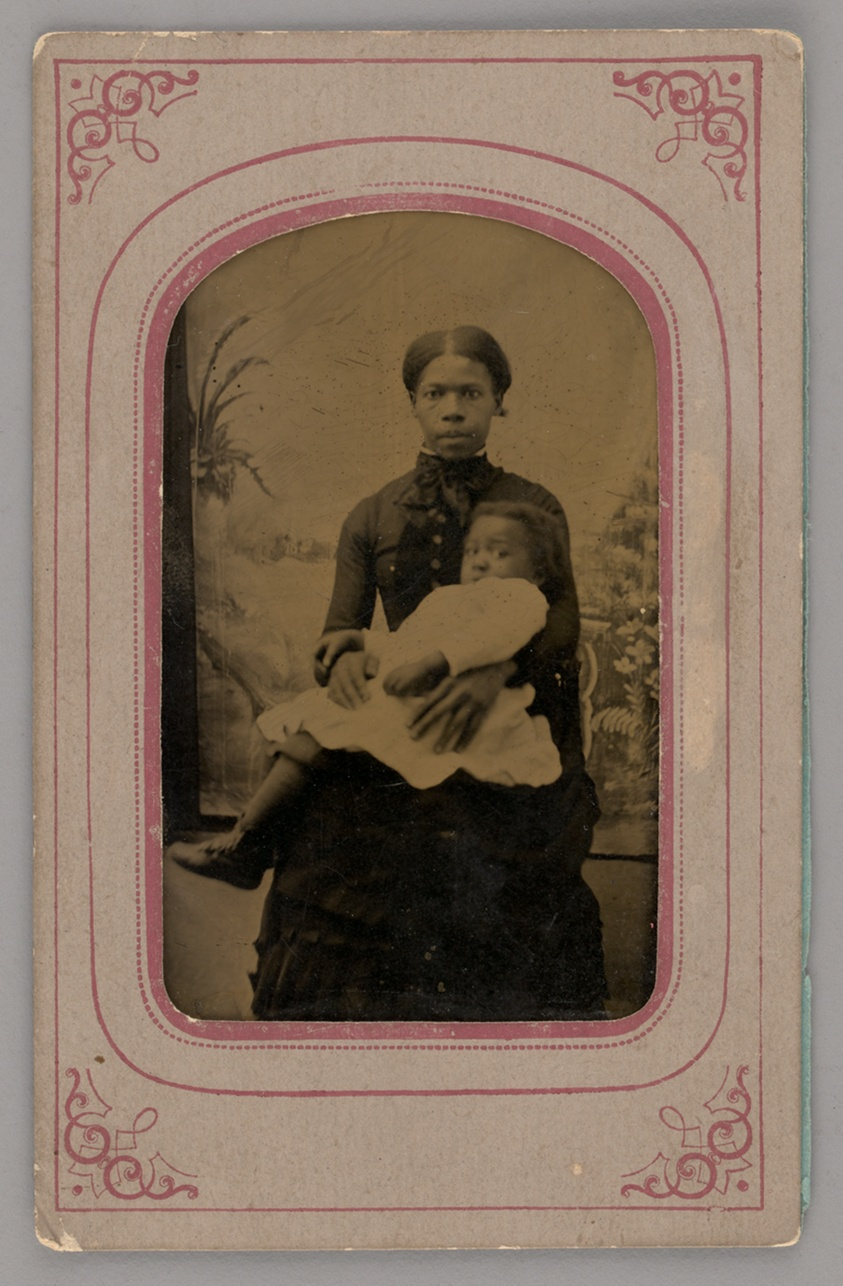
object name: Photograph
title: Untitled (Portrait of a Woman Holding a Baby)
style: 19th century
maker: Unknown maker; American, 19th century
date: 1860s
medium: Tintype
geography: United States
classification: portrait; tintype; photograph; photographic process; photography; portrait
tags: portraits: African American subject, lundberg collection, African American, portraits, portraits: female subject, portrait, woman, mother and child, babies, female